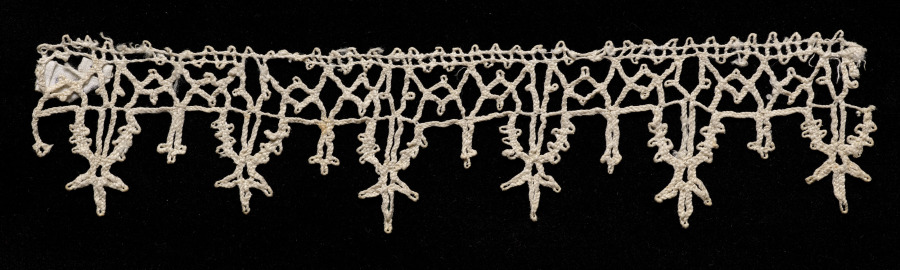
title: Lace Edging of Points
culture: Italy, Venice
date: 1540–60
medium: Bobbin lace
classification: Lace